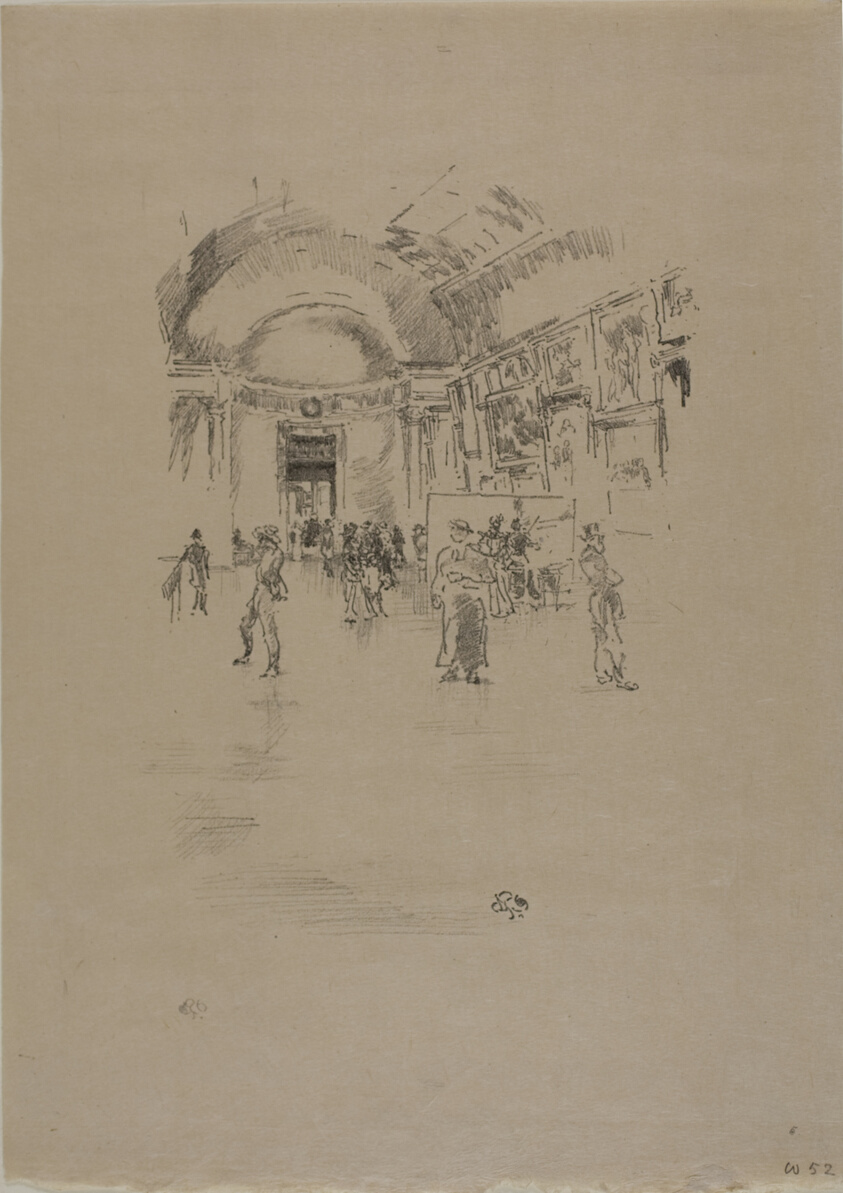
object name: Print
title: The Long Gallery, Louvre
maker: James McNeill Whistler (American, 1834-1903)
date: 1894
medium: Transfer lithograph in black with stumping, on cream laid Japanese vellum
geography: United States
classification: transfer lithograph; lithograph; print; prints and drawing